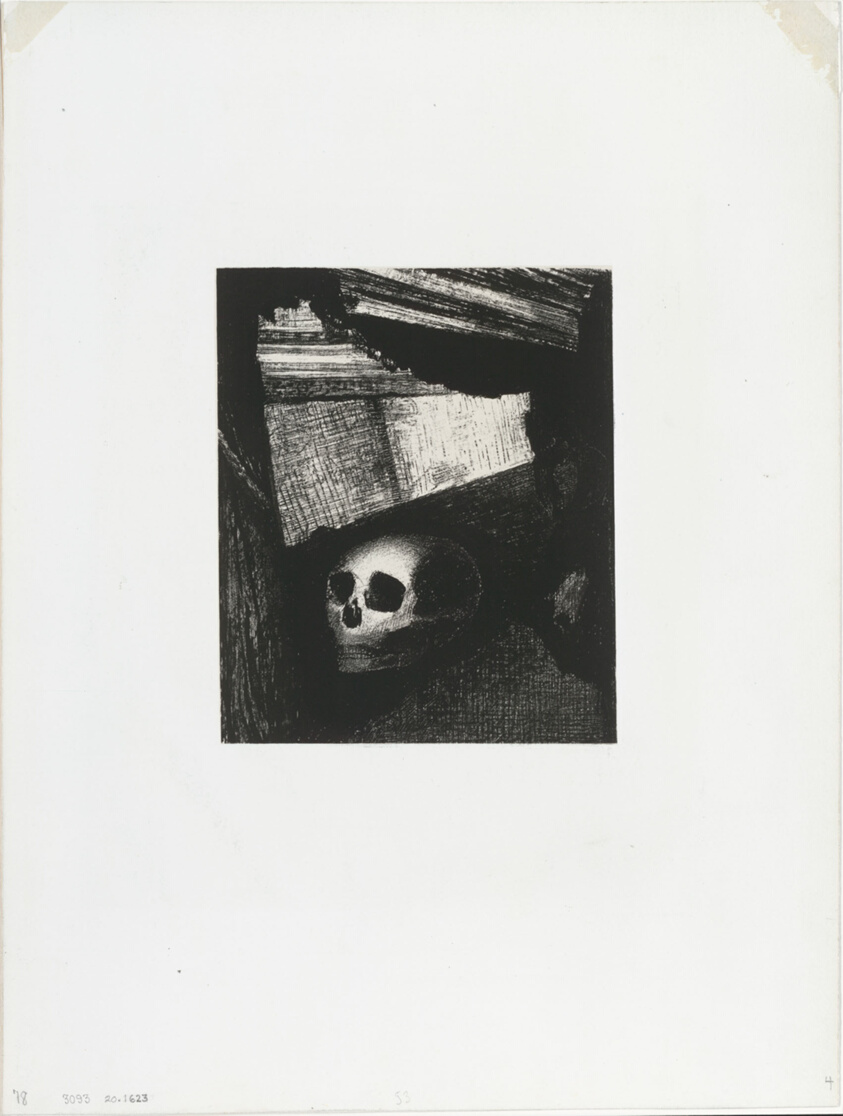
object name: Print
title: A Man of the People, a Savage, from The Juror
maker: Odilon Redon (French, 1840-1916)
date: 1887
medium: Lithograph on cream chine collé, laid down on white wove paper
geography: France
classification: lithograph; print; prints and drawing; paper